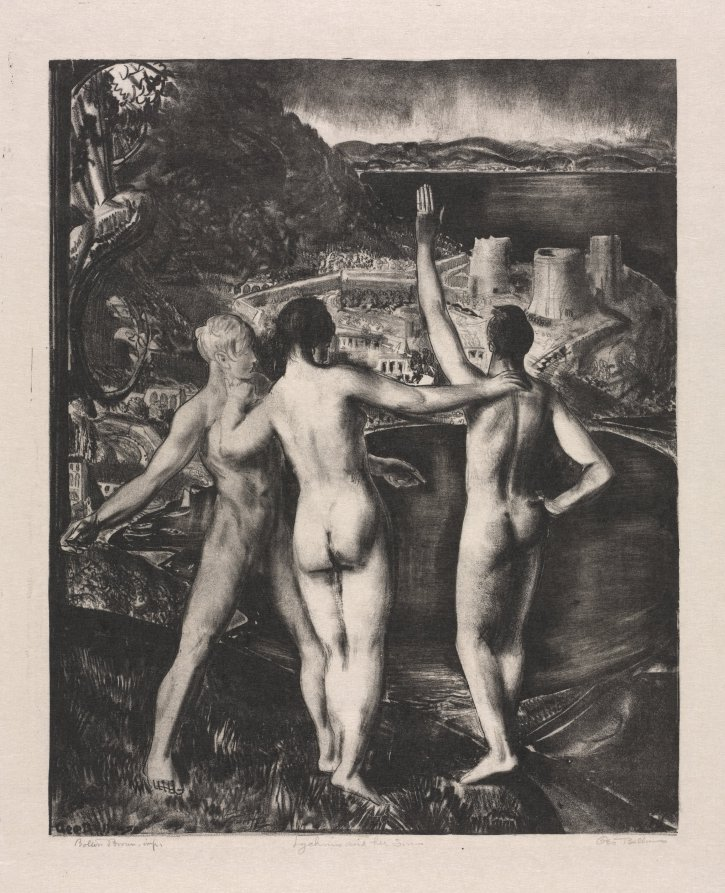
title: Lychnis and Her Sons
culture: America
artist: George Bellows (American, 1882–1925)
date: 1923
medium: lithograph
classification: Print